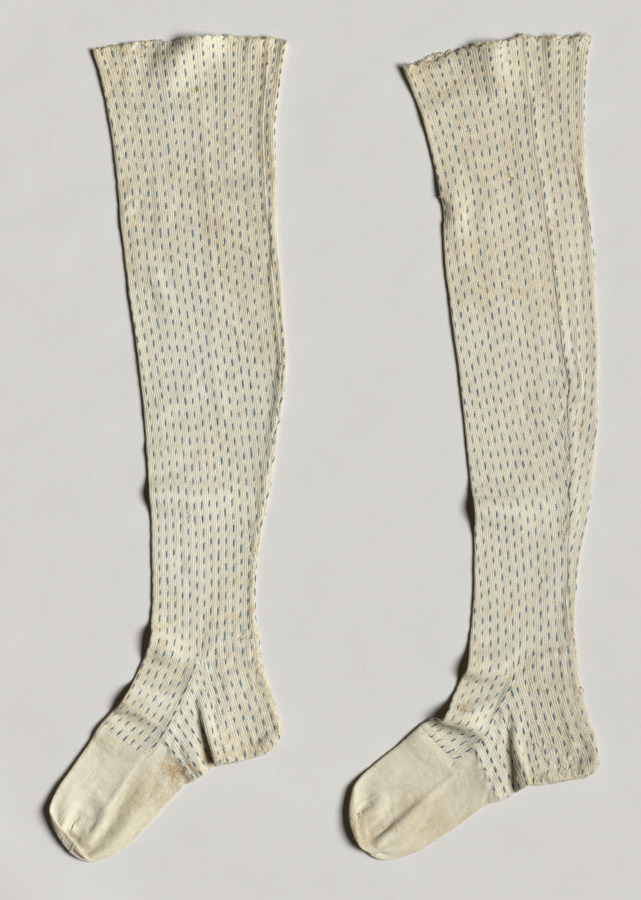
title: Pair of Stockings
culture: America, New York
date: 1790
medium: knitting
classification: Knitting